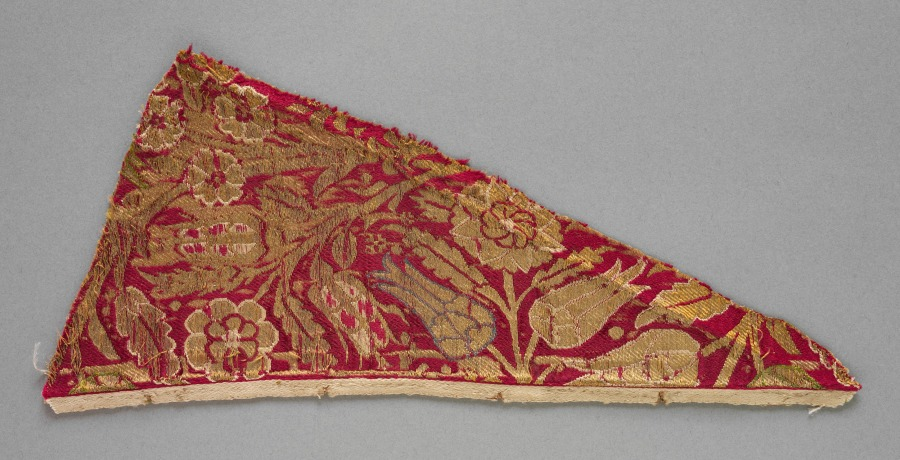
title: Textile Fragments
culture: Turkey, Bursa, 16th century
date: 16th century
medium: brocaded silk with metal thread weft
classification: Textile